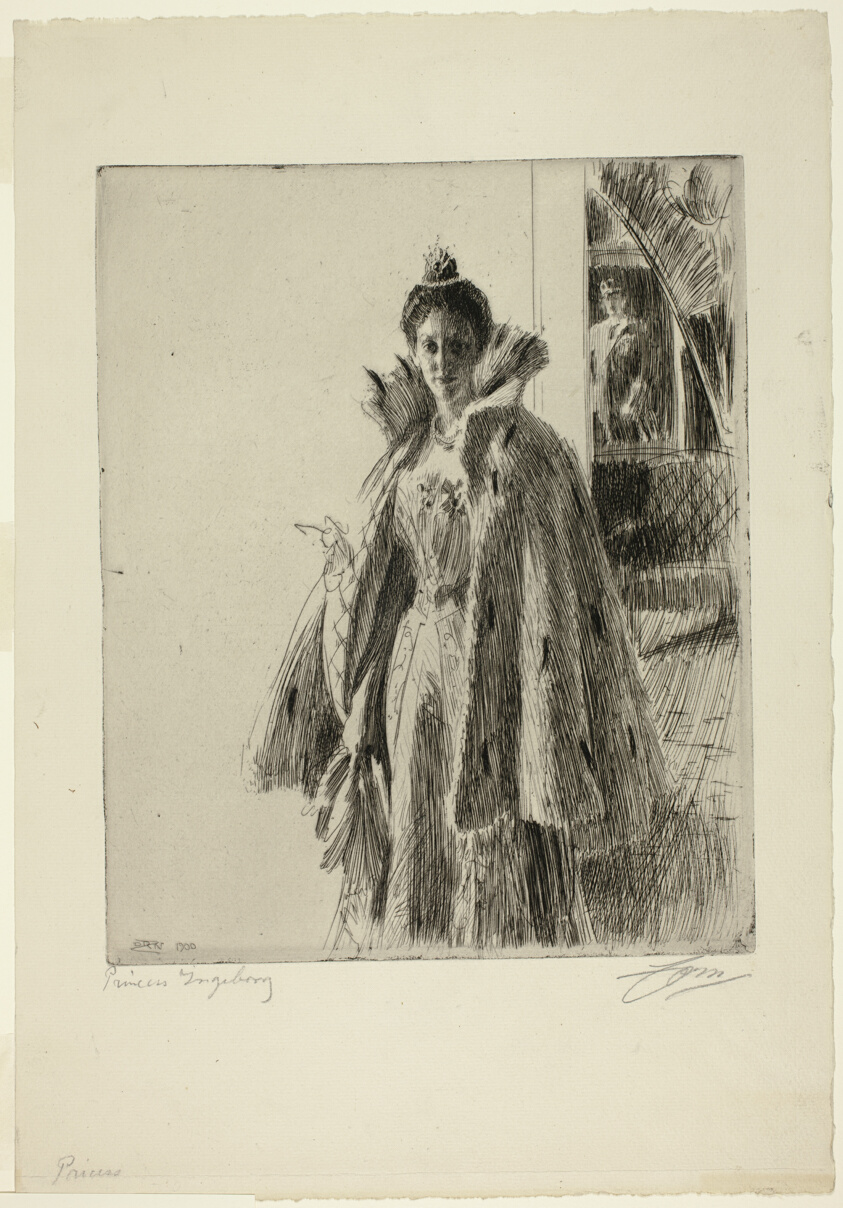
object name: Print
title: H. R. H. Princess Ingeborg of Sweden I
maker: Anders Zorn (Swedish, 1860-1920)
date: 1900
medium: Etching on ivory laid paper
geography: Sweden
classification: etching; print; prints and drawing